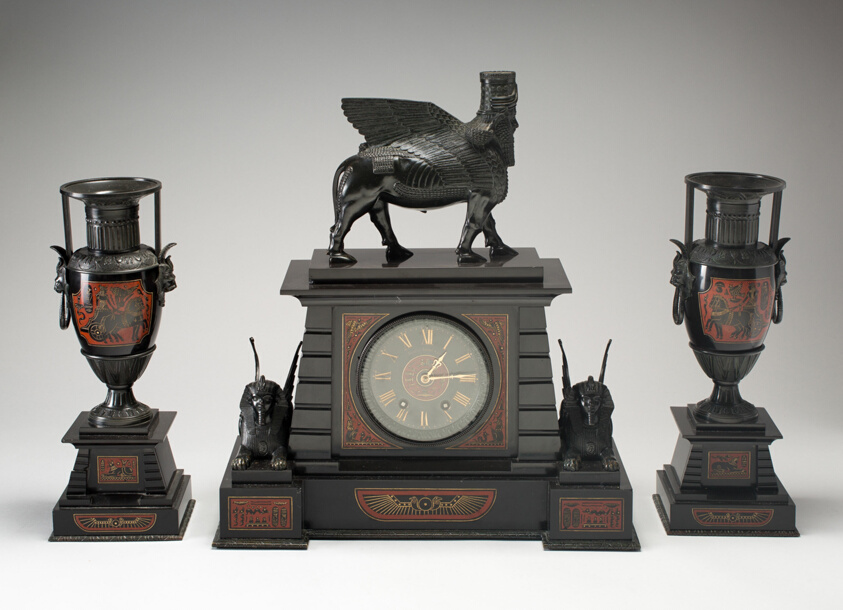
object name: Decorative Arts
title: Urn (one of a pair)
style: egyptian revival, european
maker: Brocot; Paris, France, 19th century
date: 1875/90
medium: Black marble with red, gold, and black inlaid decoration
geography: Paris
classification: stone; european decorative arts; decorative arts